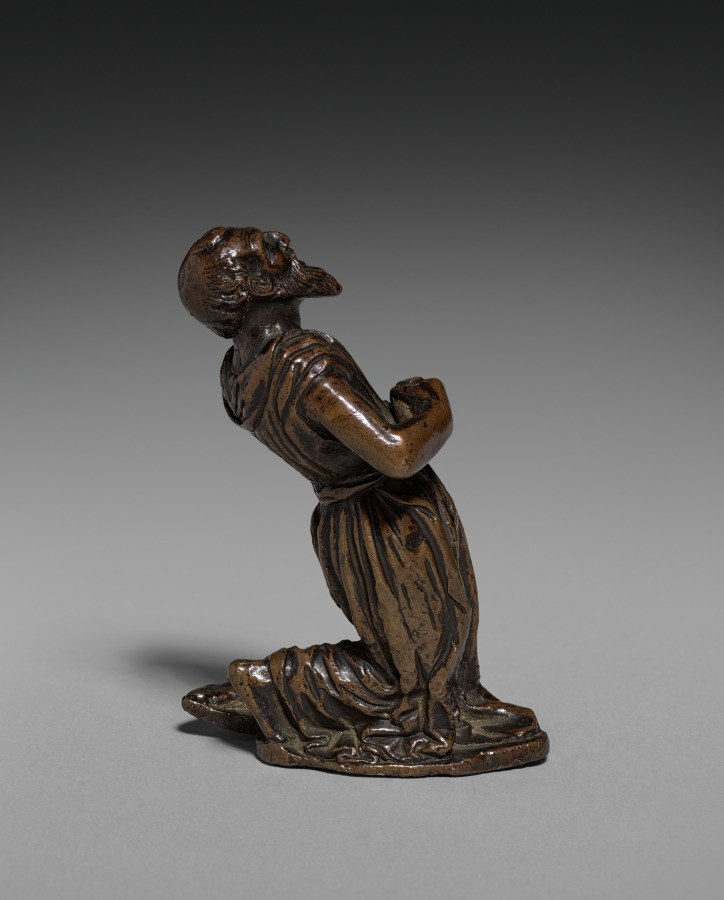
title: Kneeling Saint Jerome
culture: Italy, Ravenna, 16th century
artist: workshop of Severo da Ravenna (Italian, c.1496–c.1543)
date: c, 1525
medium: bronze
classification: Sculpture